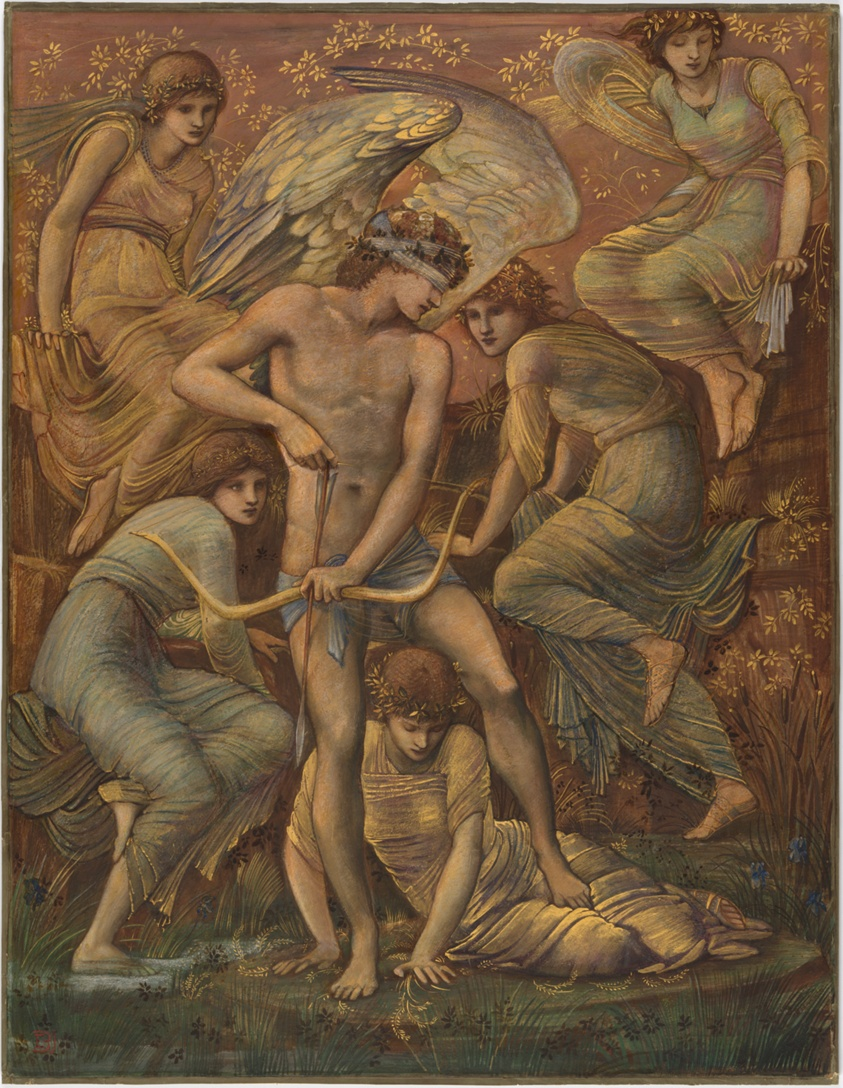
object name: Drawing and Watercolor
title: Cupid's Hunting Fields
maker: Sir Edward Burne-Jones (English, 1833-1898)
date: 1885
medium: Gouache, with watercolor and gold and silver paints on ivory wove paper, laid down on linen canvas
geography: England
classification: gouache; drawings (visual works); prints and drawing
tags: mythology